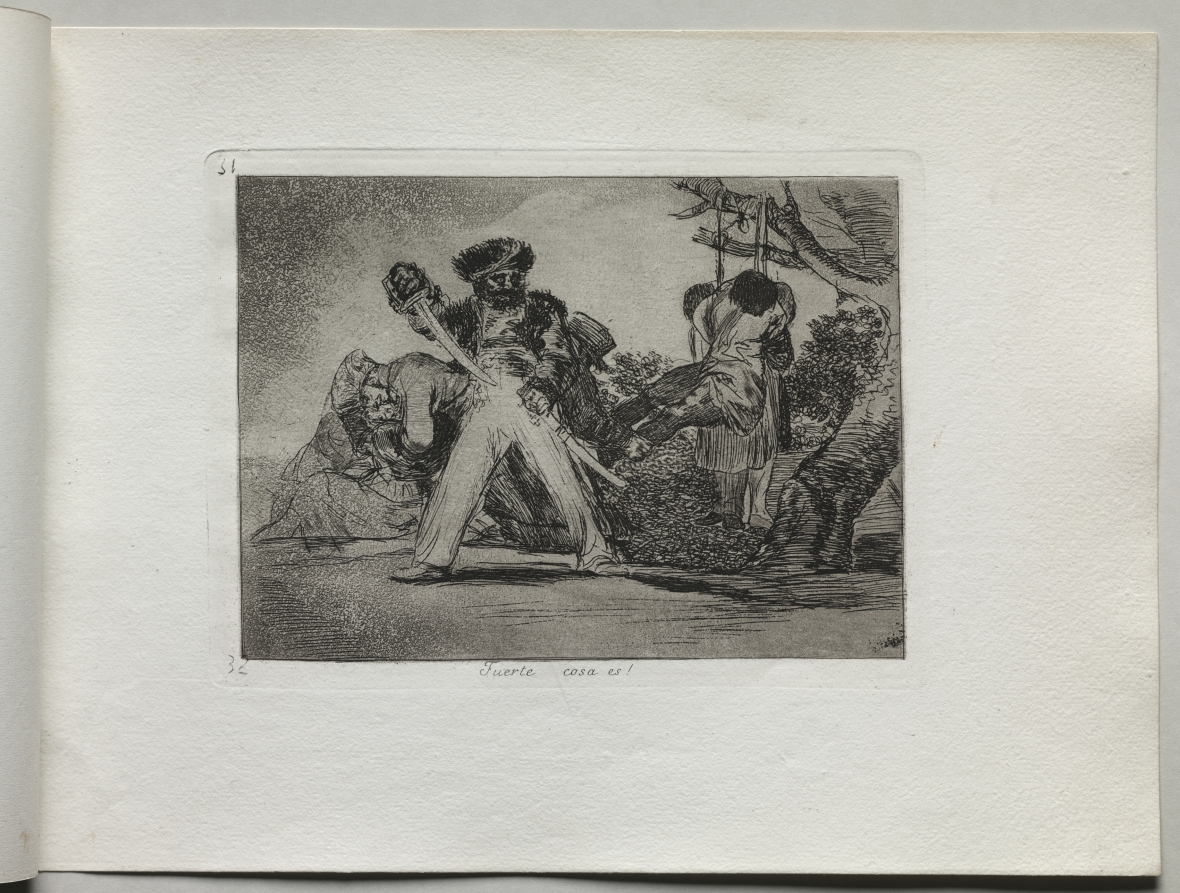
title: Disasters of War: That's Tough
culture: Spain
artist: Francisco de Goya (Spanish, 1746–1828)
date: 1810–1820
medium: etching, aquatint, and drypoint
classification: Print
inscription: Title printed below image center: "Fuerte cosa es!;" "#31" printed top left; "#32" printed lower left